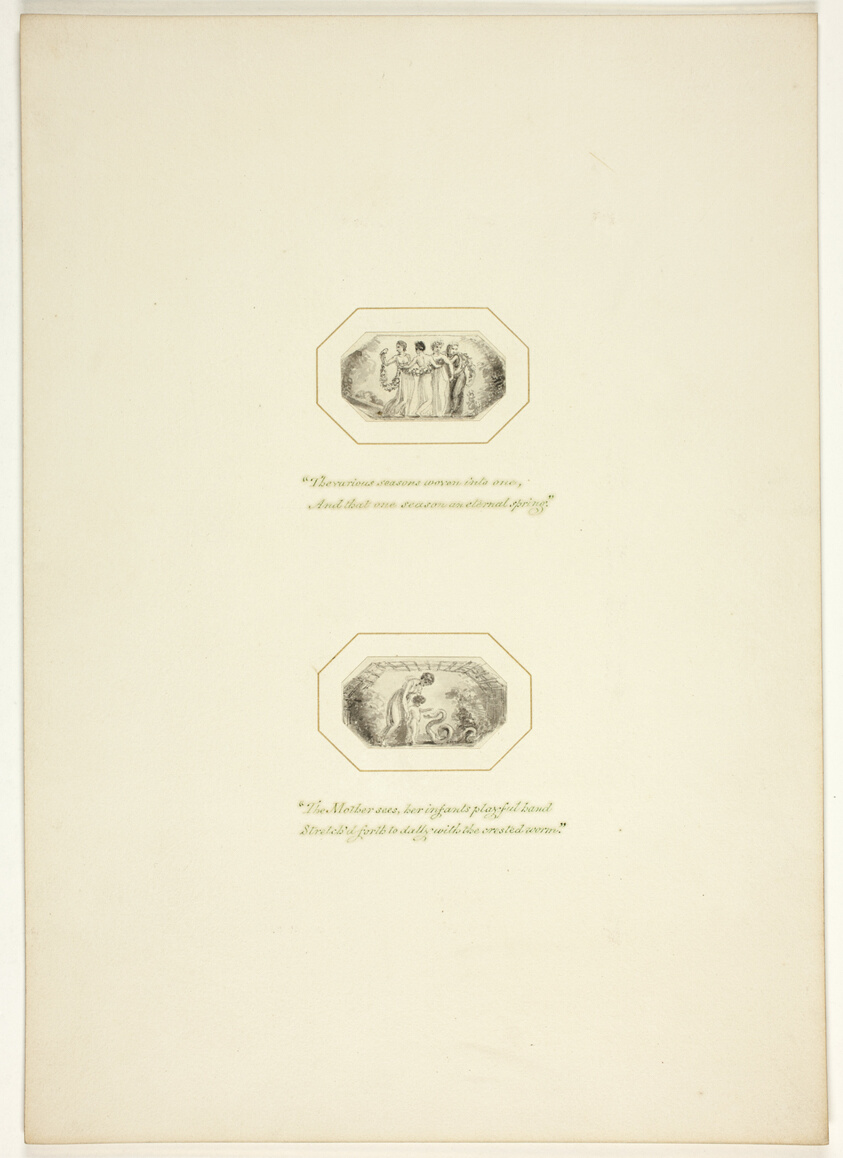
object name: Drawing and Watercolor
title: Study for a plate from The Task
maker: Thomas Stothard (English, 1755-1834)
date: c. 1800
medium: Ink wash on paper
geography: England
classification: ink or chalk wash; drawings (visual works); prints and drawing